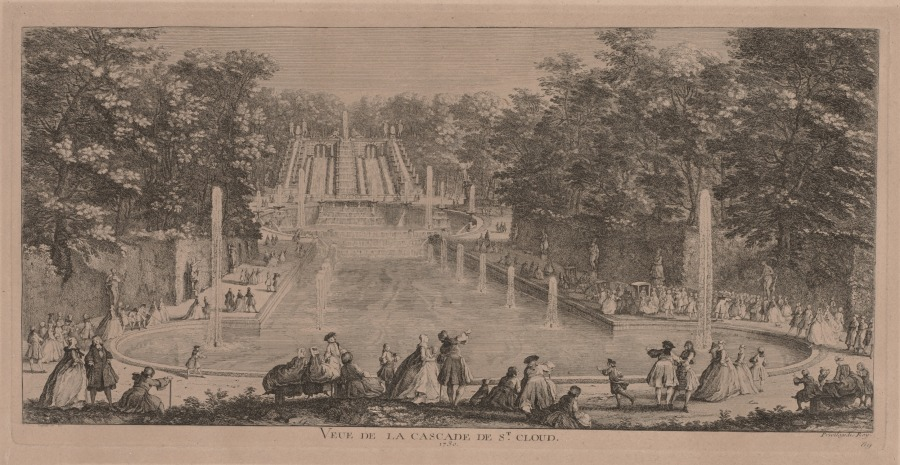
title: The Cascades of St. Cloud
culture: France, 18th century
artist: Jacques Rigaud (French, 1681–1754)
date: c. 1720–50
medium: engraving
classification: Print